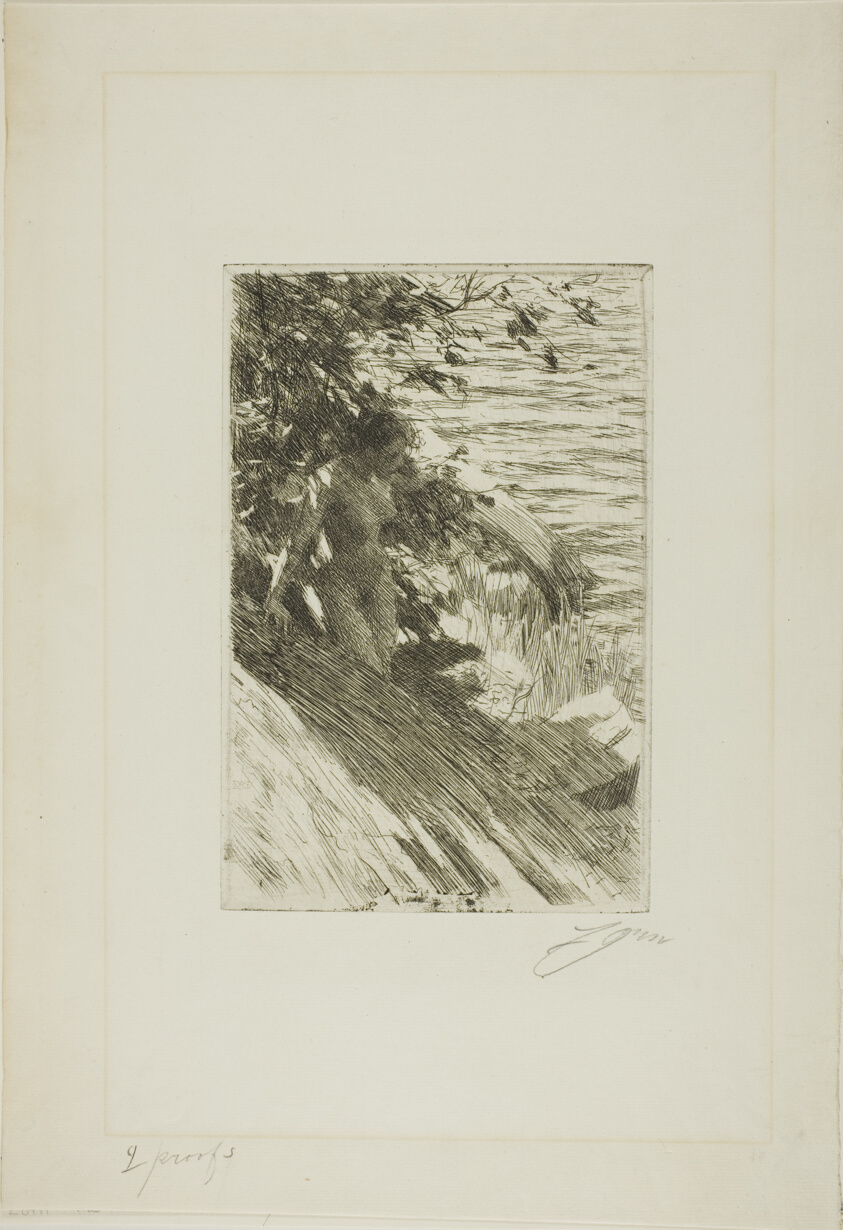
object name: Print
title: "La Grande Baigneuse" - The Great Bather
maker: Anders Zorn (Swedish, 1860-1920)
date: 1895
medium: Etching on ivory laid paper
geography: Sweden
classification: etching; print; prints and drawing